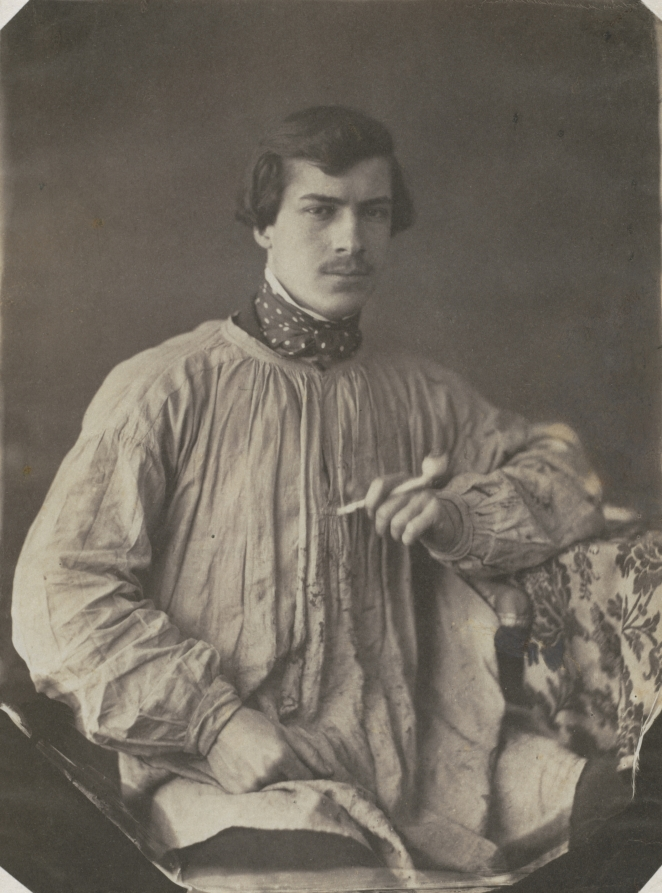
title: Artist (or Assistant) with Pipe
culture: France, 19th century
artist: Frank Chauvassaignes (French)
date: 1853–1857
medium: salt print from wet collodion negative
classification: Photograph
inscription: written in pencil on recto: "N1119J"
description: Frank Chauvassaignes' portrait is an outstanding example of compositional and technical achievement in early French photography. A handsome young painter, outfitted for work in the studio in a rumpled smock, appears to be caught in a moment of introspection, pipe in hand. The camera's lowered position gives the sitter a dignified air. In this formally balanced portrait, the photographer captured not only the sitter's physical likeness, but also his state of mind. Chauvassaignes, a photographer with a trained and sophisticated eye, lived in Clermont-Ferrand, a city in central France, and was a member of the Société française de photographie. To date, little information has been found about this artist and his small, though remarkable, body of known images